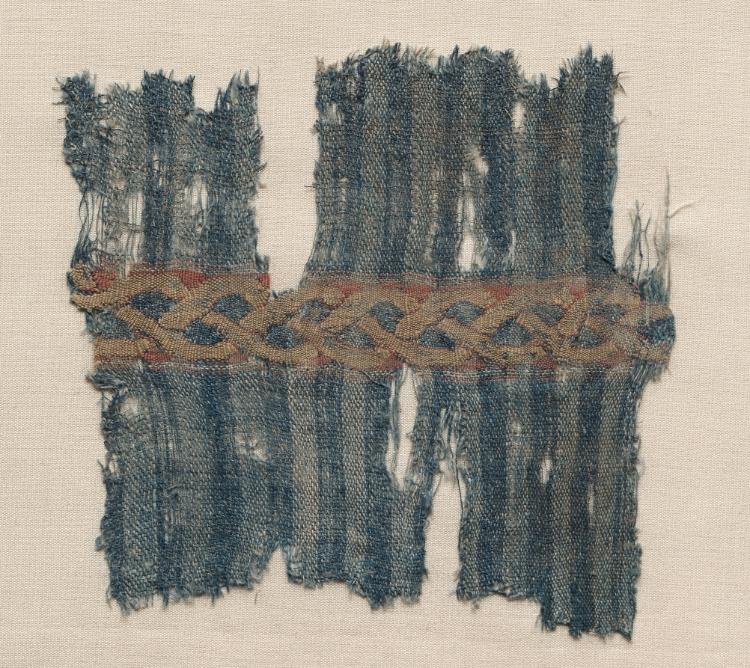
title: Fragment of a Tiraz-Style Textile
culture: Egypt, Fatimid period, Caliphate of al-Hafiz, AH 524-565, 12th Century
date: 1130 – 1169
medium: tabby ground with inwoven tapestry ornament; linen and silk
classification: Textile